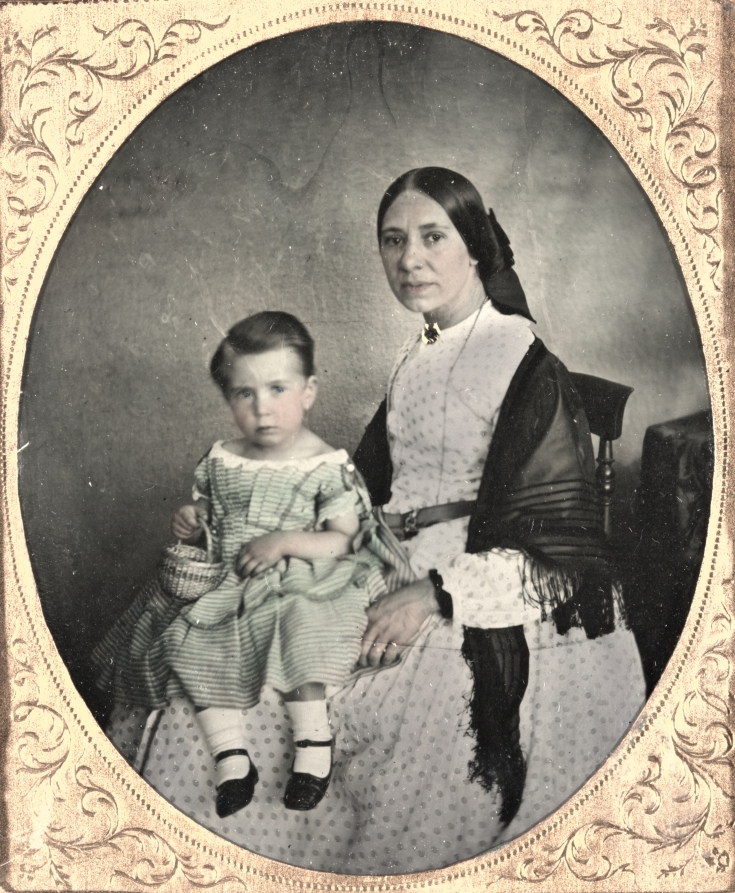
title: Mother and Child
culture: America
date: c. 1865–70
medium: ambrotype, tinted, sixth plate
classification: Photograph